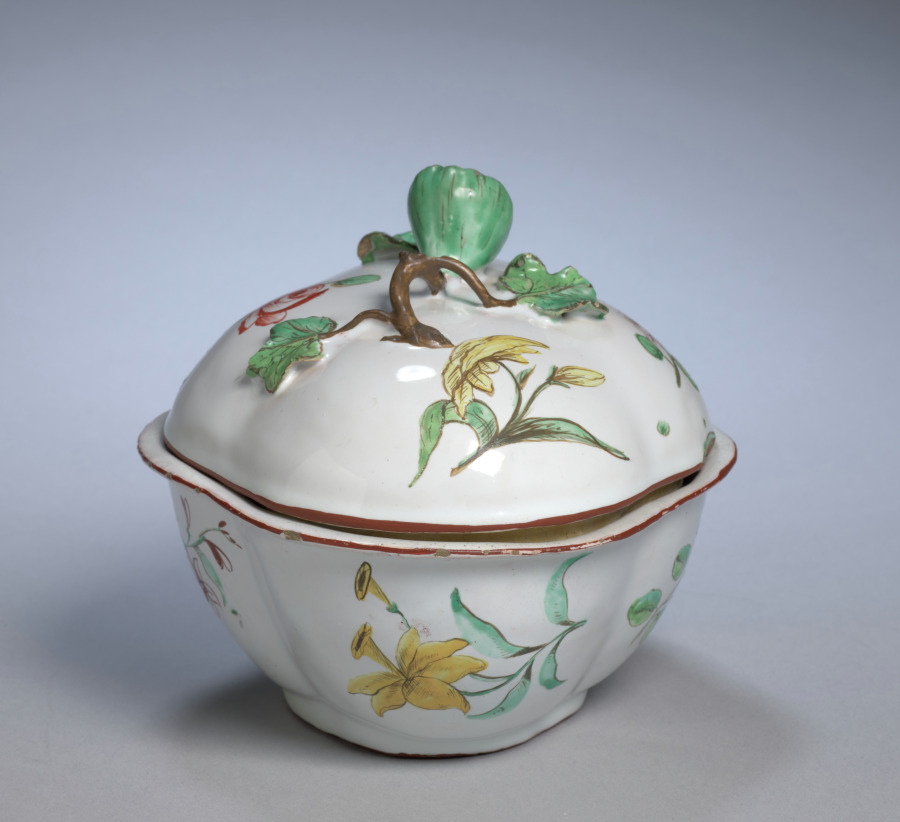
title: Sugar Basin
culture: France, 18th century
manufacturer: Sceaux Factory (French, active 1748–66)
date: c. 1750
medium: faience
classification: Ceramic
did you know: In medieval Italian churches, painted altarpieces served as a focal point for worshippers during the rituals of faith. The figures of Jesus, Mary, and eight saints are framed by a golden background that would have glistened in the flickering candlelight of the church.